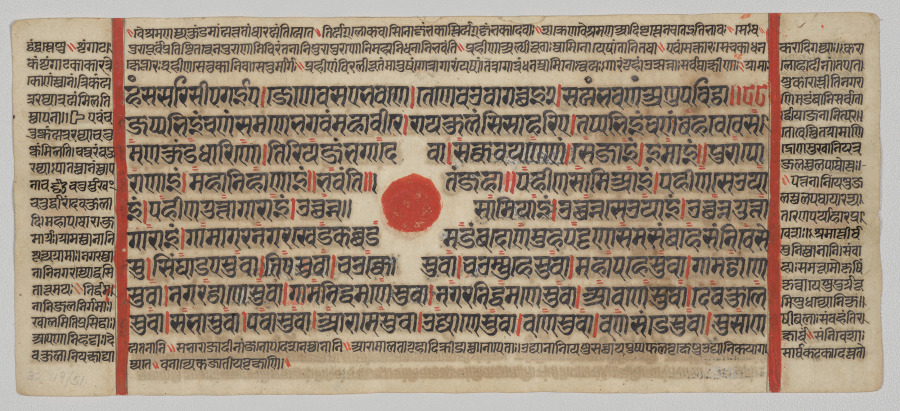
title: Text, Folio 28 (recto), from a Kalpa-sutra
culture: Western India, Gujarat, last quarter of the 15th century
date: c. 1475–1500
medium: Gum tempera, ink, and gold on paper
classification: Painting